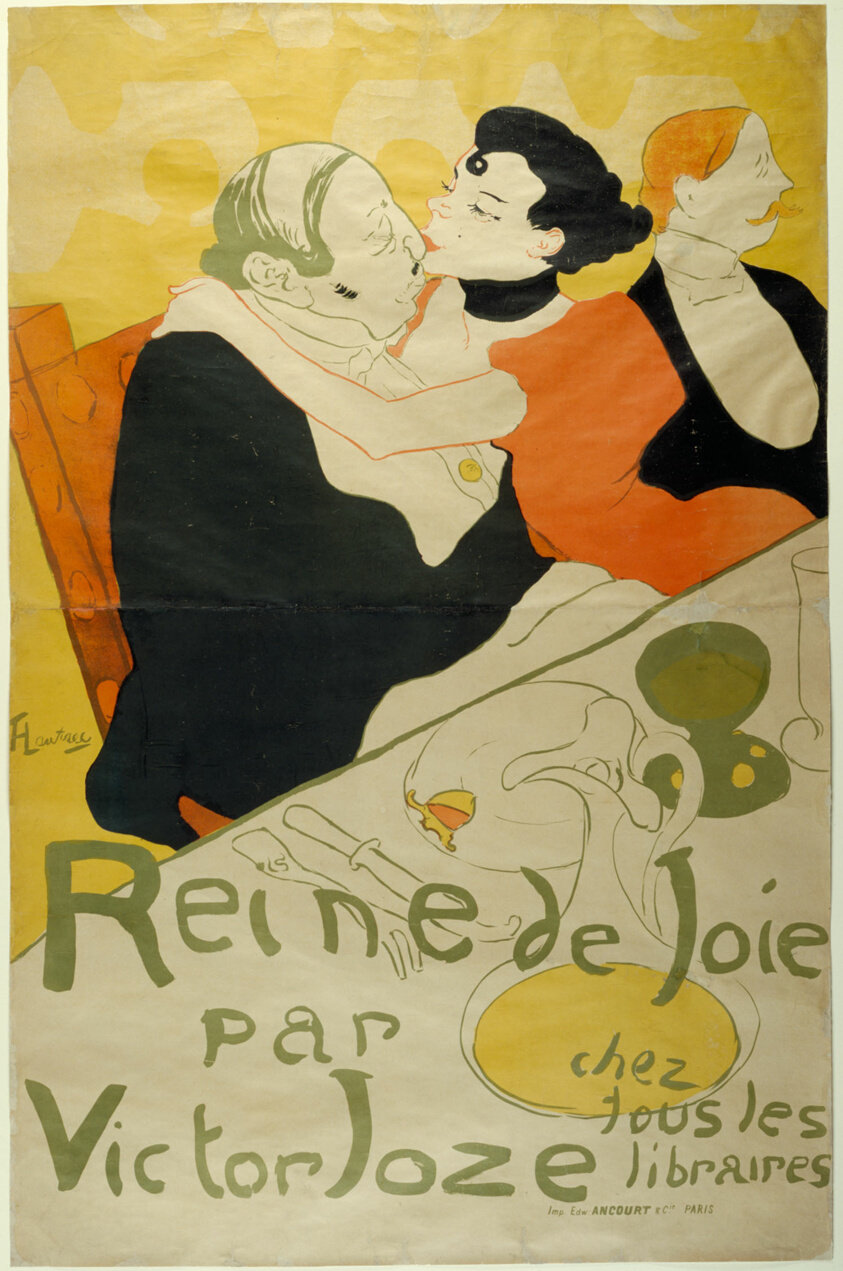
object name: Print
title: Reine de Joie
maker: Henri de Toulouse-Lautrec (French, 1864-1901); printed by Ancourt & Cie.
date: 1892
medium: Color lithograph on tan wove paper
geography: France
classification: lithograph; print; prints and drawing